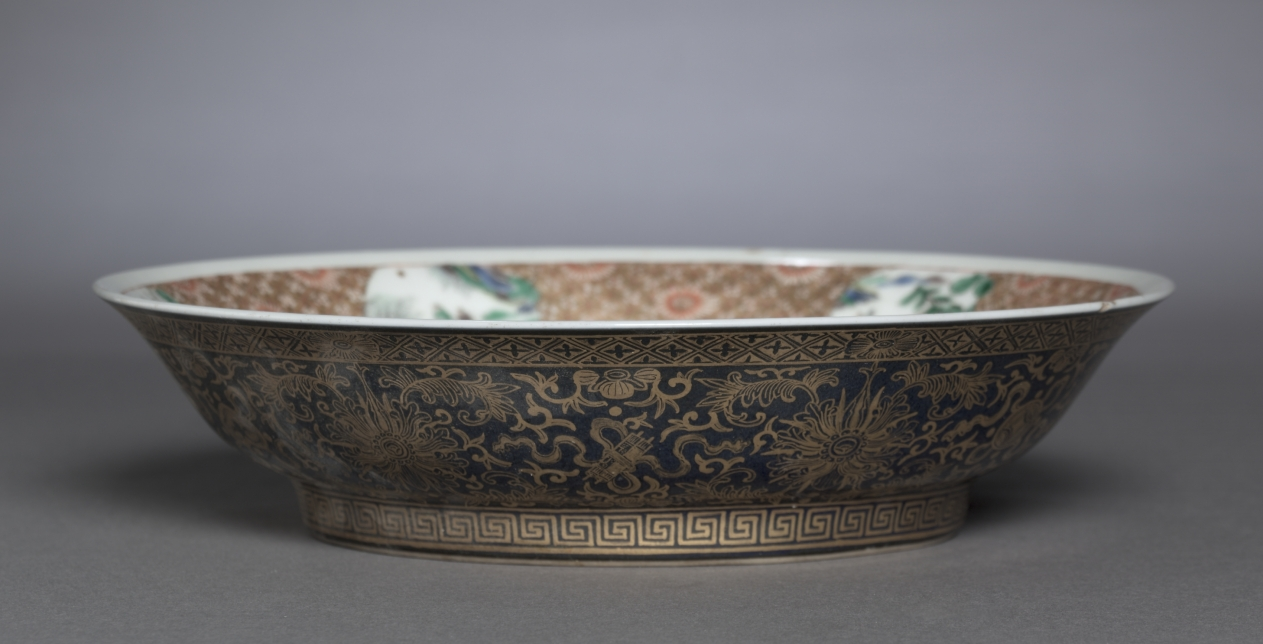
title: Dish with Zhang Guolao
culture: China, Jiangxi province, Jingdezhen kilns, Qing dynasty (1644-1911), Kangxi reign (1662-1722)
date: 1662–1722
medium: porcelain with famille verte overglaze enamel and painted gold decoration (interior) and powder blue glaze with painted decoration (exterior)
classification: Ceramic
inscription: 大清康熙年製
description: Zhang Guolao, featured on this dish, is one of the Eight Immortals and a gifted magician who was believed to know the secret arts to obtain longevity. Typically depicted as an old man and accompanied by his mule, he is the patron saint of artists. His mule is said to be magical; it can be folded up like a piece of paper to fit into a small bag. The central scene is framed by a sumptuously gold-decorated rim showing spaces reserved for landscape scenes in primarily fresh blue and green colors.